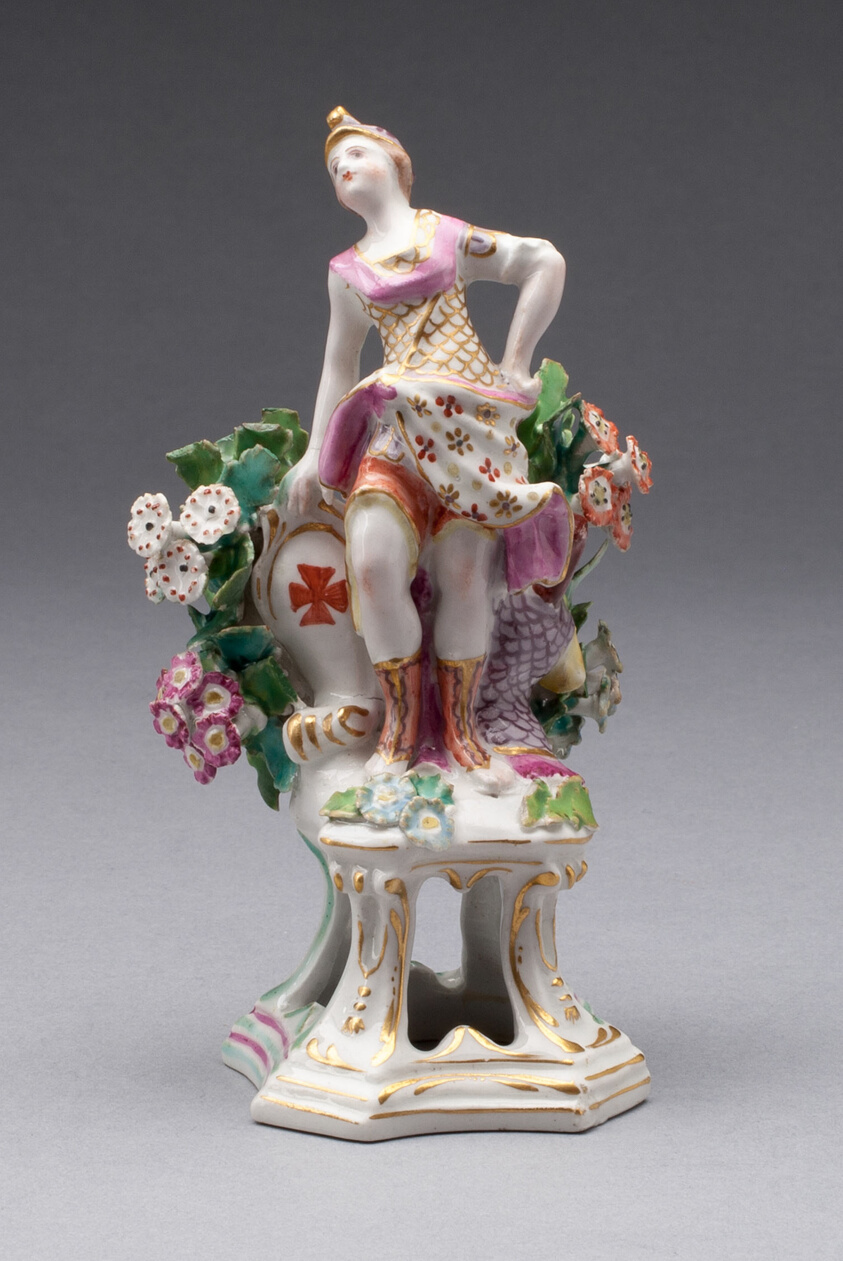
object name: Ceramics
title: Figure of Europe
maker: Bow Porcelain Factory (London, England, 1744-1775)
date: c. 1766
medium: Soft-paste porcelain, polychrome enamels and gilding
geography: Bow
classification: porcelain; european decorative arts; ceramics